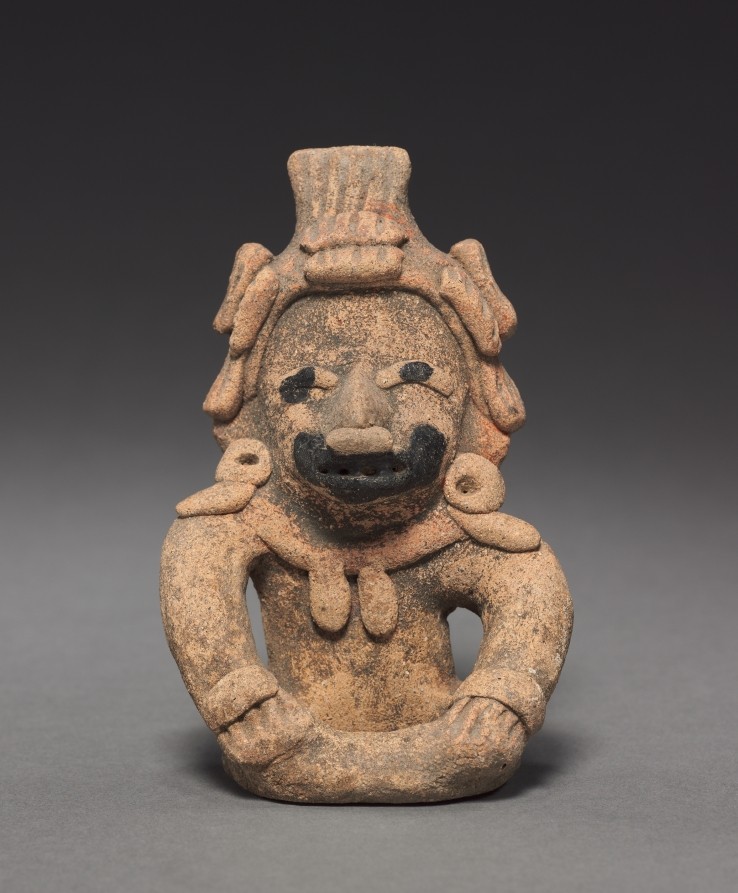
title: Seated Figurine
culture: Mexico, Veracruz, Remojadas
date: c. 150–1 BCE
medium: earthenware with asphalt paint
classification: Sculpture